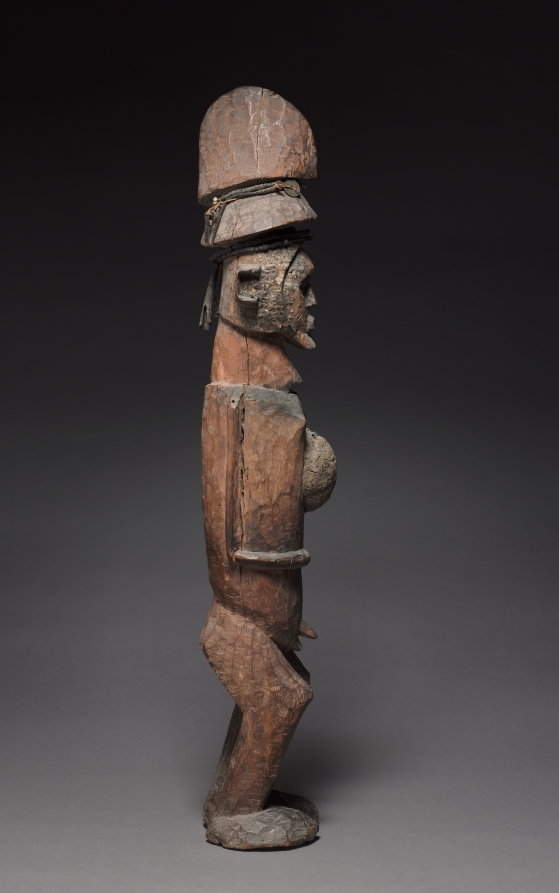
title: Male Figure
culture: Africa, Central Africa, Republic of the Congo (most likely) or Democratic Republic of the Congo, Teke-style maker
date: late 1800s-early 1900s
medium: Wood, resin, iron, copper, plant fiber, cloth, glass beads, coins, antelope horns, and cowrie shells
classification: Sculpture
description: This exceptionally large Teke figure is well preserved and holds a medicine package partly buried in an abdominal cavity. Its size suggests that it stood at the service of a larger group of people and that its powers extended beyond the limits of a village. Its scarification marks and beard identify it as representing a chief or another dignitary.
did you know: The coins on the figure’s hat were those used in the Belgian Congo.